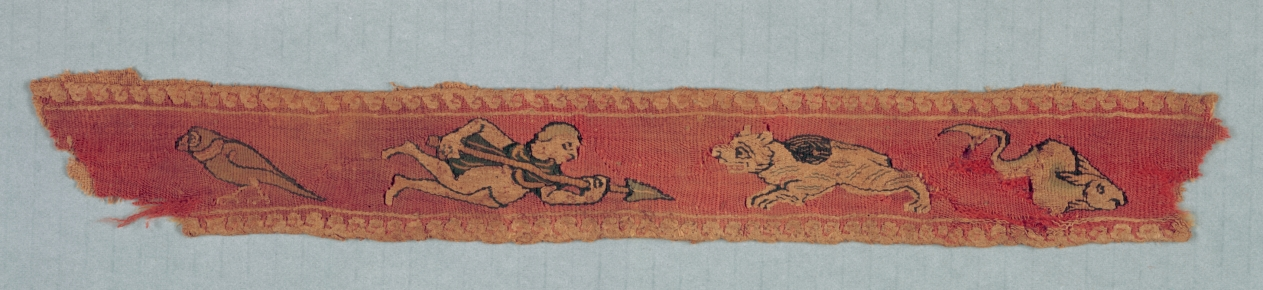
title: Fragment from a Child's Tunic: Clavus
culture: Egypt, Umayyad period (661–750)?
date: 600s–700s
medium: Wool and linen: tapestry weave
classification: Textile